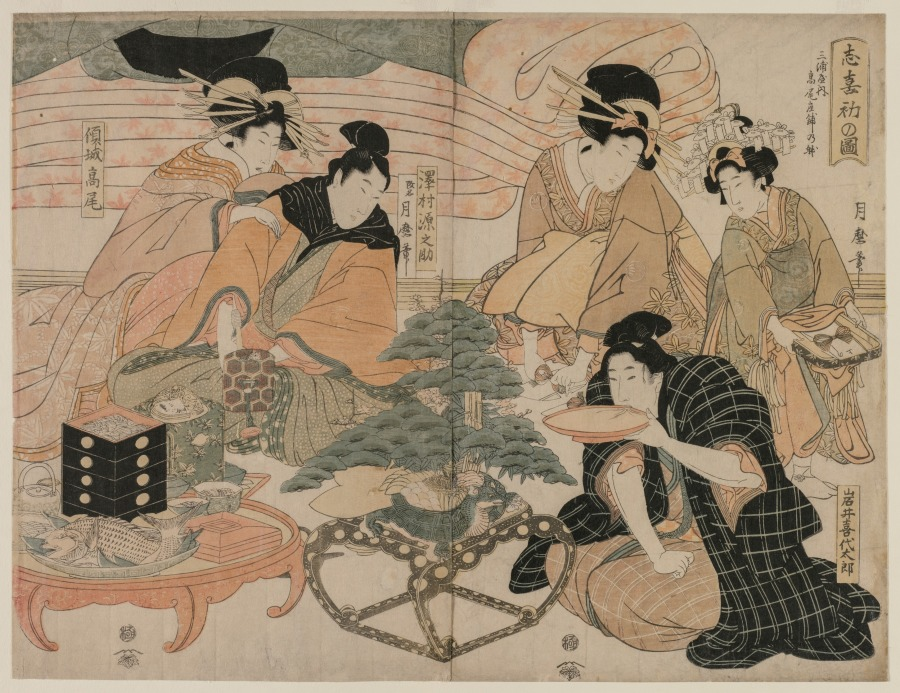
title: Picture of the First Visit to the Pleasure Quarters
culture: Japan, Edo period (1615–1868)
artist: Kitagawa Tsukimaro (Japanese, d. 1830)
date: mid 1800s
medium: color woodblock print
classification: Print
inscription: Signature: Tsukimaro hitsu (right panel); kaimyo Tsukimaro hitsu (center panel) Publisher: Tsutaya Juzaburo (emblem) Censorship Seal: kiwame